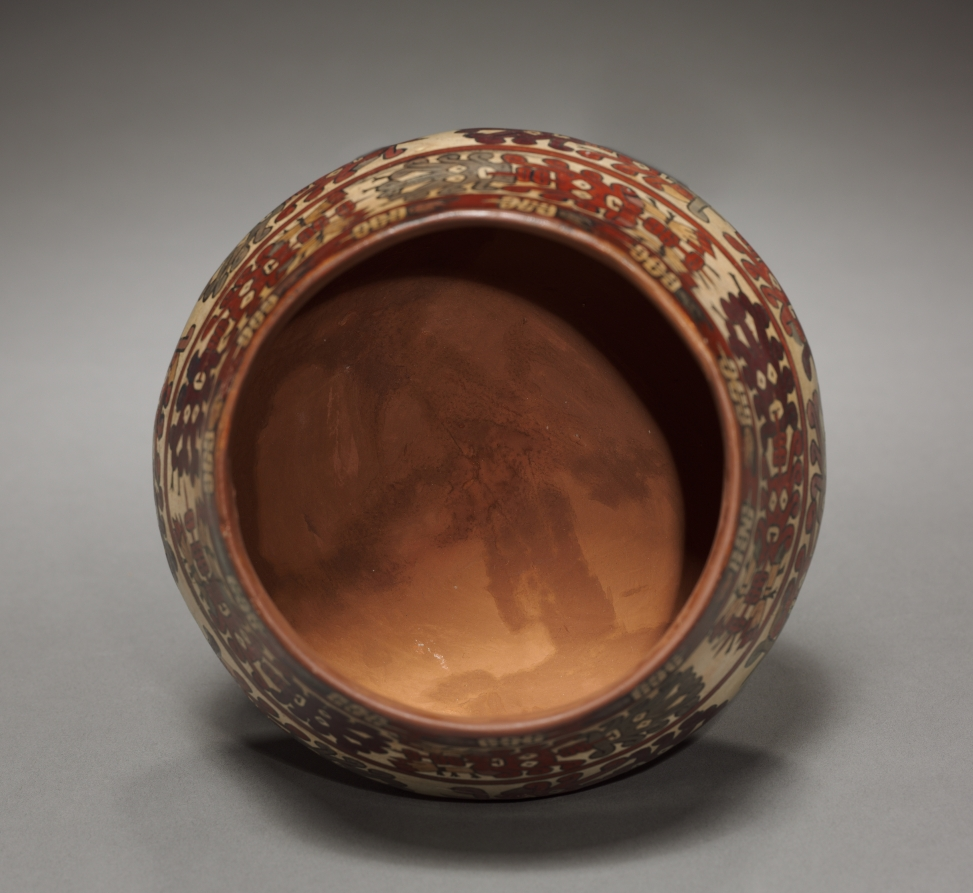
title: Vessel with Abstract Heads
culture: Peru, South Coast, Nasca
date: 100 BCE–700 CE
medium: earthenware with colored slips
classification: Ceramic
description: Late Nasca supernatural depictions became abstract, detailed, and focused on the head. In this vessel's central register, for instance, a deity is reduced to two mask-like faces, edged by volutes and linked by tongues; the only remains of a body are the hands. The lower register carries a similar image, and the upper register has severed human heads.